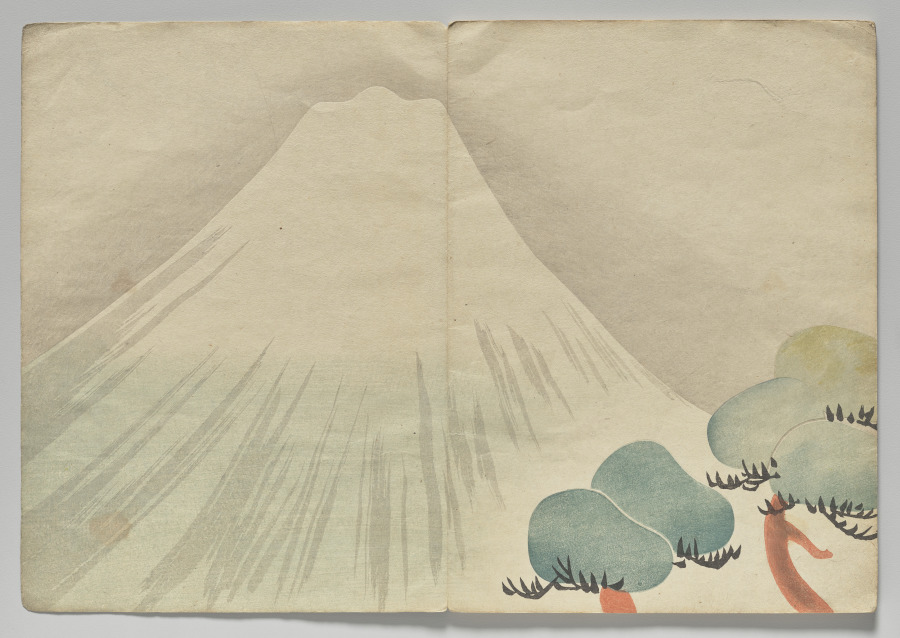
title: Scene from The Kōrin Picture Book (Volume 2)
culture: Japan, Edo period (1615–1868)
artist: Nakamura Hōchū (Japanese, d. 1819)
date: 1800s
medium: color woodblock printed book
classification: Bound Volume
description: Ogata Korin (1658-1716) was one of the most admired artists of Rimpa, or "decorative school painting." These books by the charming later-generation Rimpa artist Hochu record Korin's inventive designs.